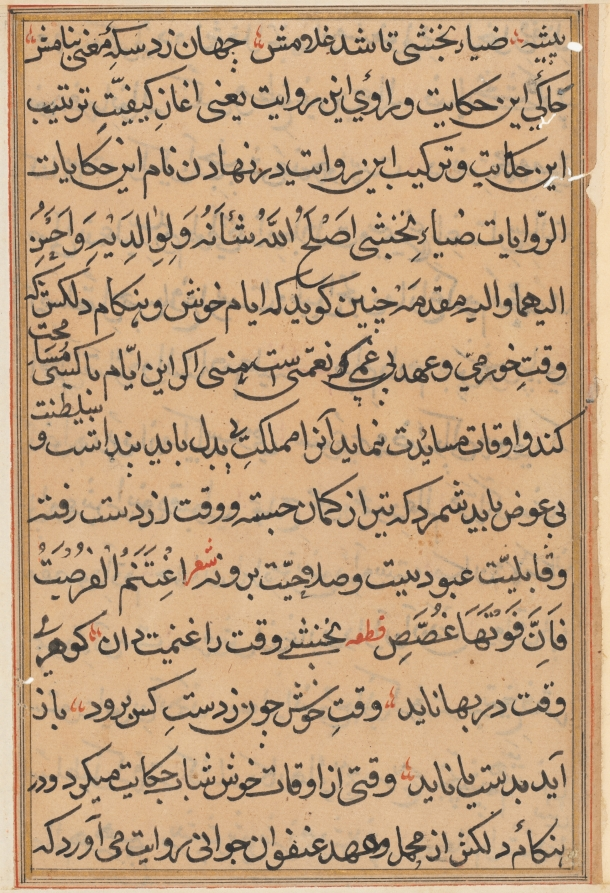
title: Page from Tales of a Parrot (Tuti-nama): text page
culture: Mughal India, court of Akbar (reigned 1556–1605)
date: c. 1560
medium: gum tempera, ink, and gold on paper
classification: Painting